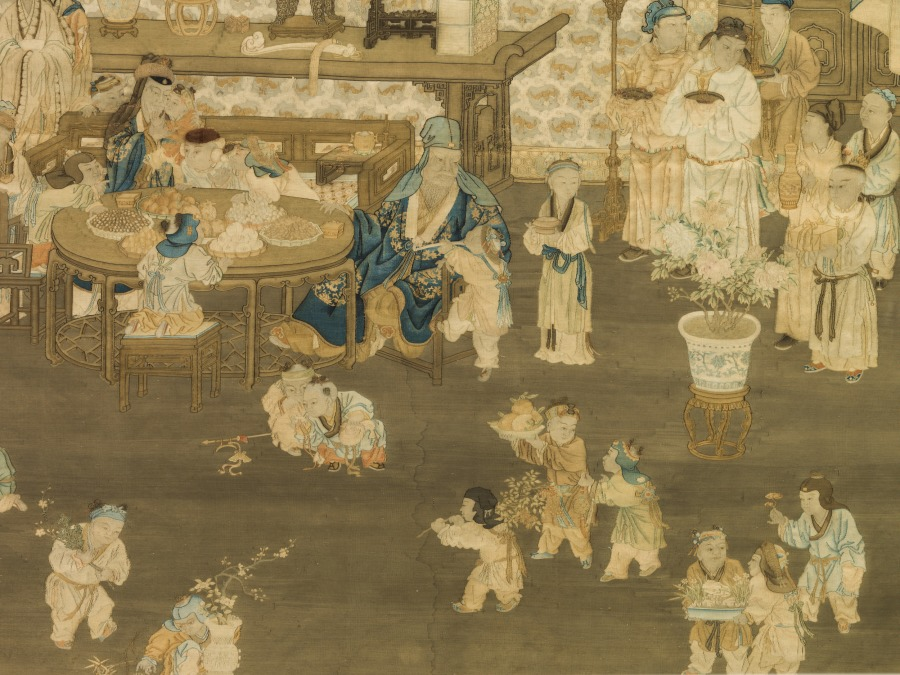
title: Family Gathering on New Year's Morning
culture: China, Qing dynasty (1644-1911)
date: late 1760s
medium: Silk and wool: tapestry weave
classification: Tapestry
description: This European-style tapestry depicts a family gathering, in a woven Western picture frame, that presumably once furnished the Hall of Cultivating the Mind (Yangxin dian) in the Forbidden City. The tapestry employs Western perspective and shading combined with the traditional Chinese subject of a family gathering in a palace, including motifs expressing wishes for good fortune and for a peaceful reign. In 1766, six French tapestries had been presented to the Chinese court. The Qianlong emperor was so intrigued that he commissioned tapestries in the French style from Suzhou. Records mention an imperial order for tapestries in the Western style, such as this one, in 1769, 1770, and 1775.